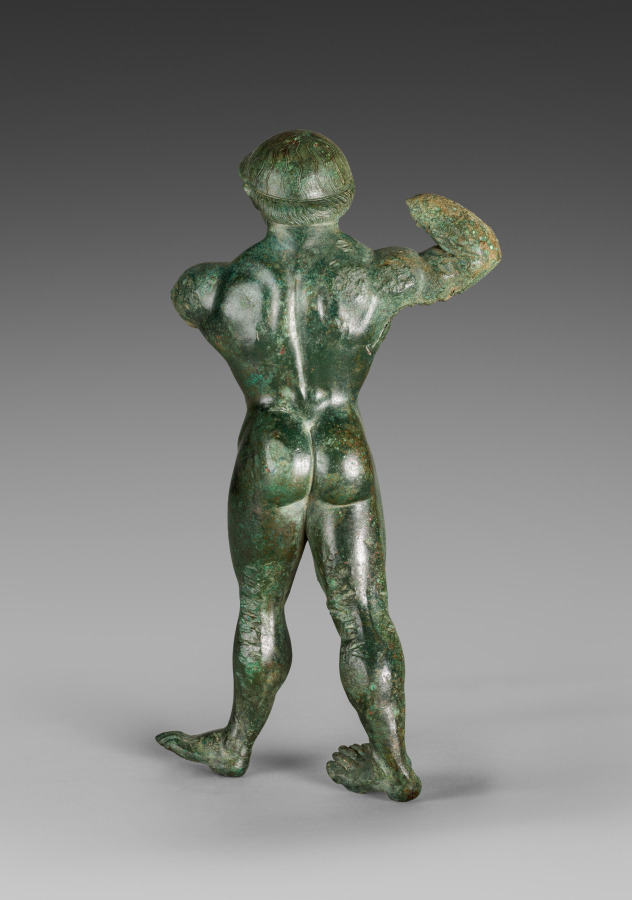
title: Statuette of Herakles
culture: Greek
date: 510–500 BCE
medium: bronze (solid cast)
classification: Sculpture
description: Striding forward with his left foot, this nude figure turns his torso and raises his tightly bent right arm behind his head. Despite significant damage, the statuette conveys a naturalistic sense of form and movement rarely seen in early Greek art. Its most striking feature is its powerful physique, with sharply defined, bulging muscles. Formerly called an athlete and assumed to have held a javelin or discus, the figure likely depicts the hero Herakles, revered for his strength and often shown in this smiting pose, wielding a club. Though usually bearded in this period, this representation emphasizes his youthfulness, with an idealized face and carefully arranged hair.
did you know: This robust figure exudes power, despite his damaged feet and missing hands.